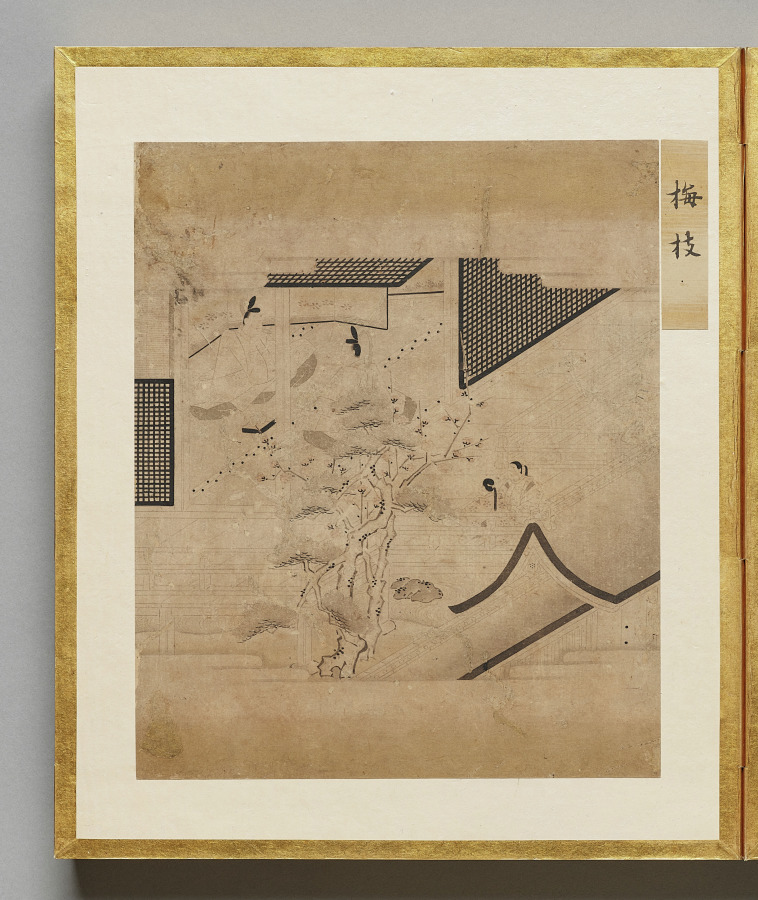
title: Branch of Plum from Album of Illustrations for the Tale of Genji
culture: Japan, Edo period (1615–1868)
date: 1600s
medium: painting in an accordion-style album; ink, light color, and gold on paper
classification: Bound Volume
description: This album contains illustrations for the classic literary work the Tale of Genji, authored in the 1000s by Murasaki Shikibu, an aristocrat of the Heian period (794–1185) court. The scenes are painted in the “white drawing” (hakubyō) mode, in which a fine ink line is used to depict figures and spaces with great subtlety, punctuated only occasionally by traces of red pigment for a character’s lips, a detail of a garment, or a decorative element. These two scenes illustrate episodes from the chapters “Thin Veil of Cloud” (Usugumo) and “Barrier Gate” (Sekiya).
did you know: The illustrations are identified by chapter title in cartouches to the upper right of the paintings.